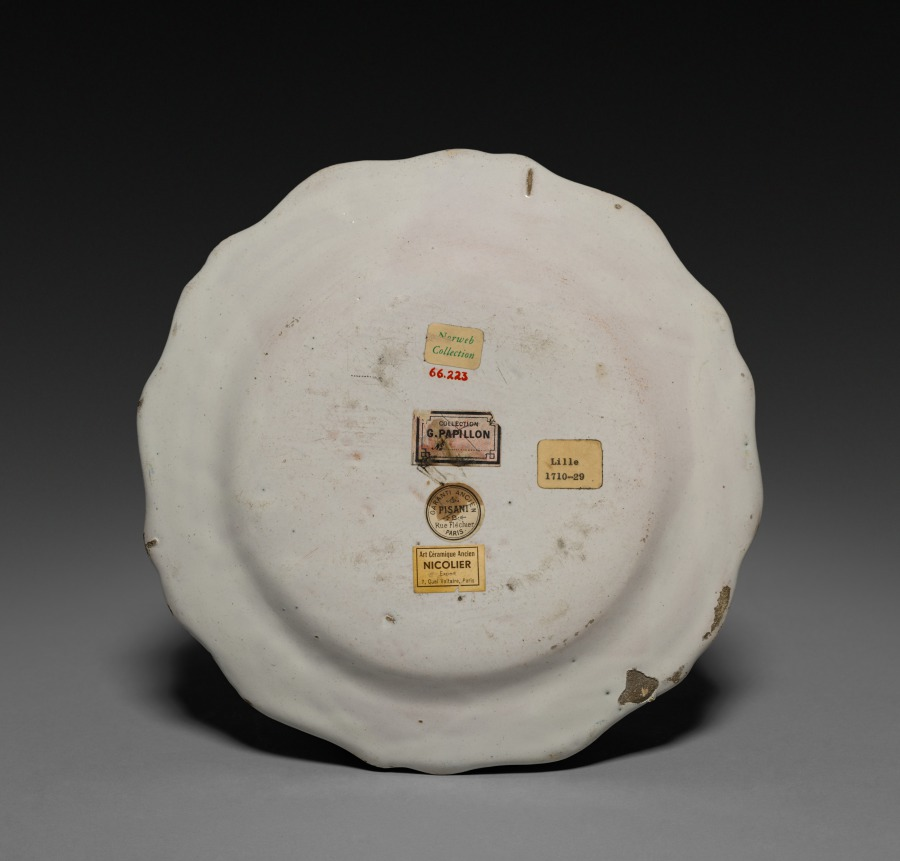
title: Plate with Playing Cards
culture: France, Lille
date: c. 1760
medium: faience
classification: Ceramic